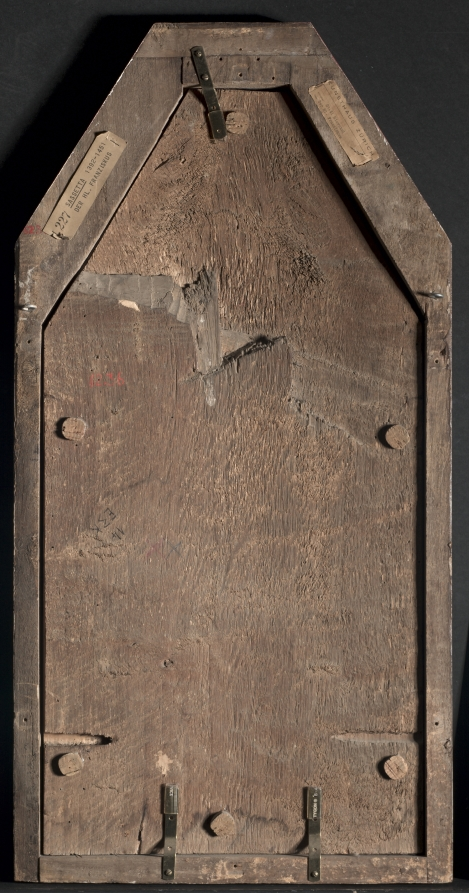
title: St. Francis Kneeling before Christ on the Cross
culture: Italy, 15th century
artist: Sassetta (Italian, 1392–1450)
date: 1437–1444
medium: tempera and gold on wood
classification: Painting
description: Because of his simplicity, piety, and devotion to all living creatures, Saint Francis (1181–1226) has remained among the most revered and popular saints. Born to wealthy parents in Assisi, he first lived a life of spendthrift luxury. However, Francis later gave up all worldly goods and embraced an existence of utter poverty. Throughout his adult life, the saint experienced mystical trances and visions of Christ. Atop the cross here is a leafy tree and a nest of pelicans. Fifteenth-century viewers would have recognized the tree as a reference to the cross, which is often described as a tree, symbolizing Christ's role as the source of eternal life. The pelican, shown nourishing its young with its own blood, symbolizes Christ, who sacrifices himself for the salvation of mankind. This painting was the center pinnacle on the back of a double-sided altarpiece made for the church of San Francesco in Borgo Sansepolcro (near Arezzo).